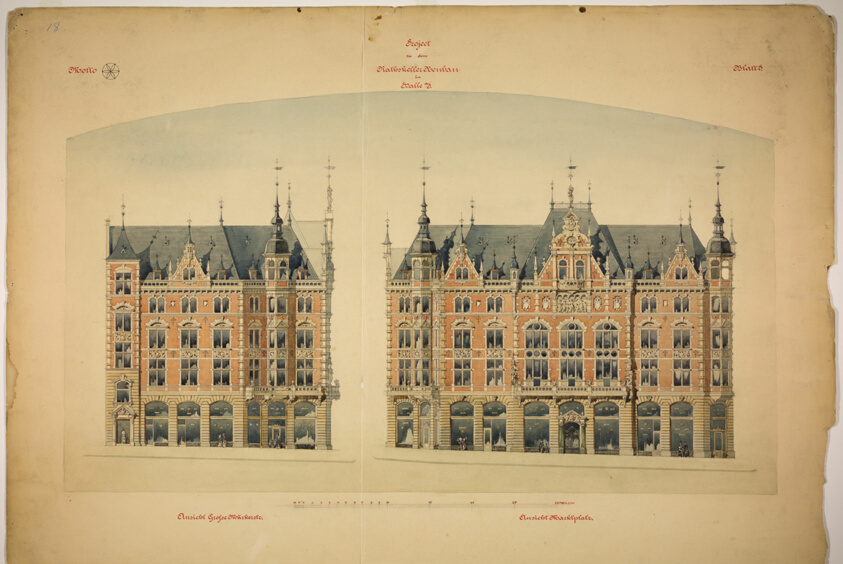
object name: Architectural Drawing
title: Rathskeller Neubau, Halle (Saale), Saxony-Anhalt, Germany, Elevations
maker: Peter J. Weber; American, born Germany, 1863-1923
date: c. 1887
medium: Graphite, ink, watercolor, and tempera on paper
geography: Saxony-Anhalt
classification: design drawing; architectural drawing